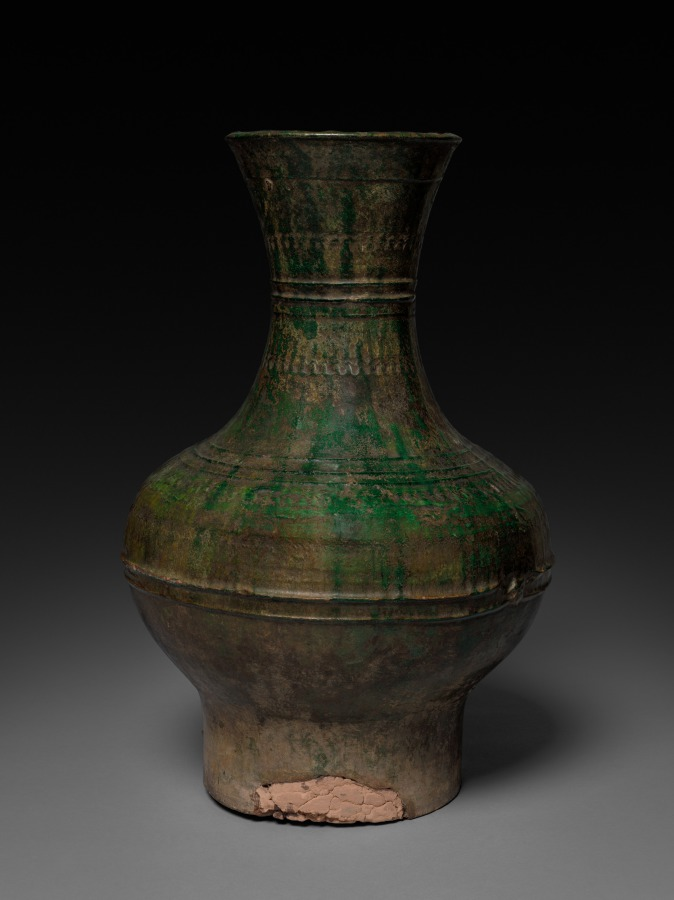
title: Jar (Hu)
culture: China, Han dynasty (202 BCE–220 CE)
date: 206 BCE–220 CE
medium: earthenware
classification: Ceramic